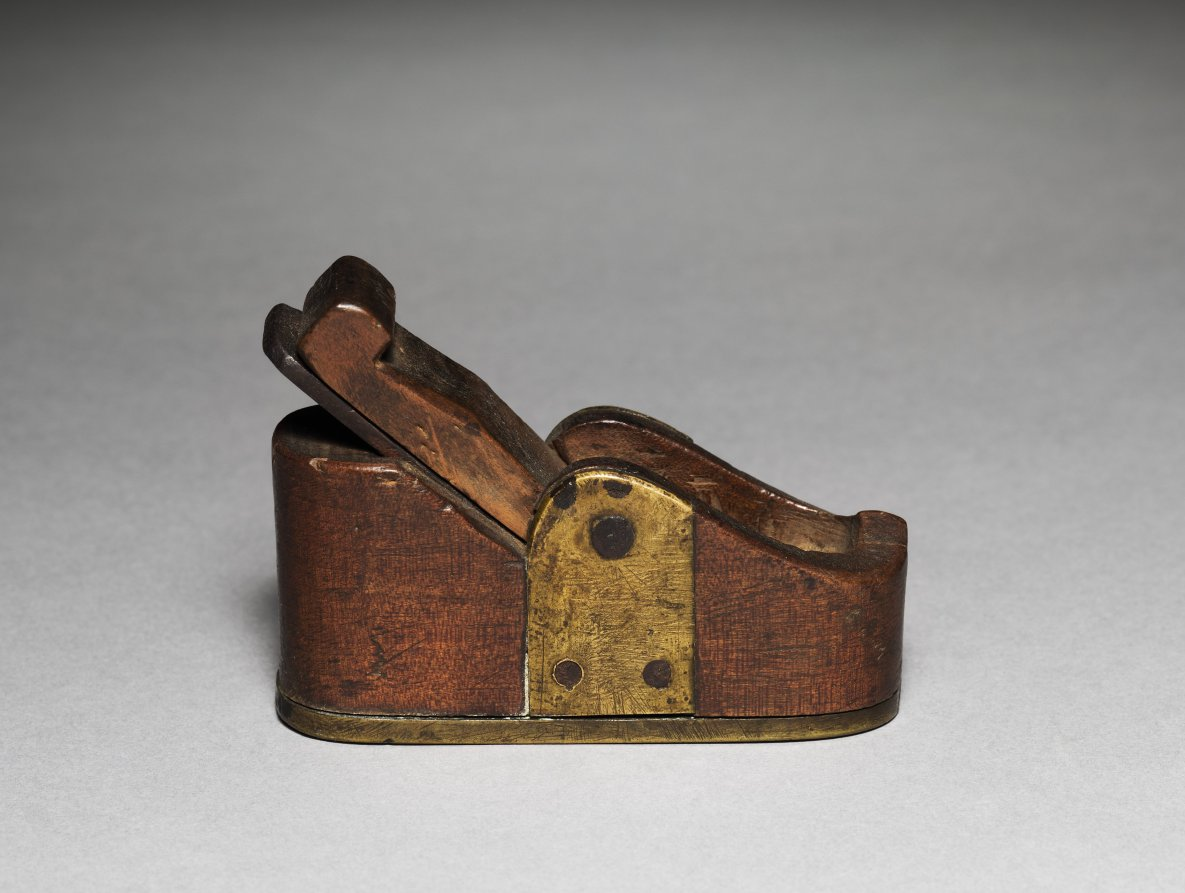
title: Plane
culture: Europe, 18th century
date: 1700s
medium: wood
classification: Tool